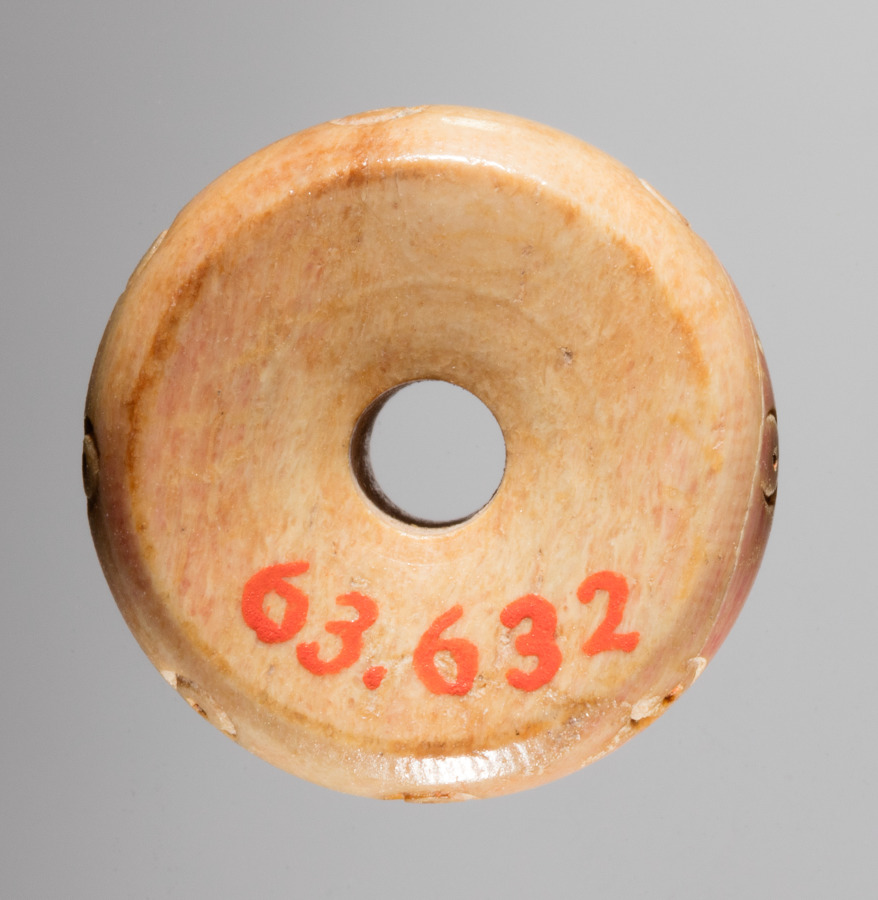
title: Spindle Whorl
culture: Iran, early Islamic period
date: 700s - 900s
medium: bone, incised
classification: Spindle Whorl